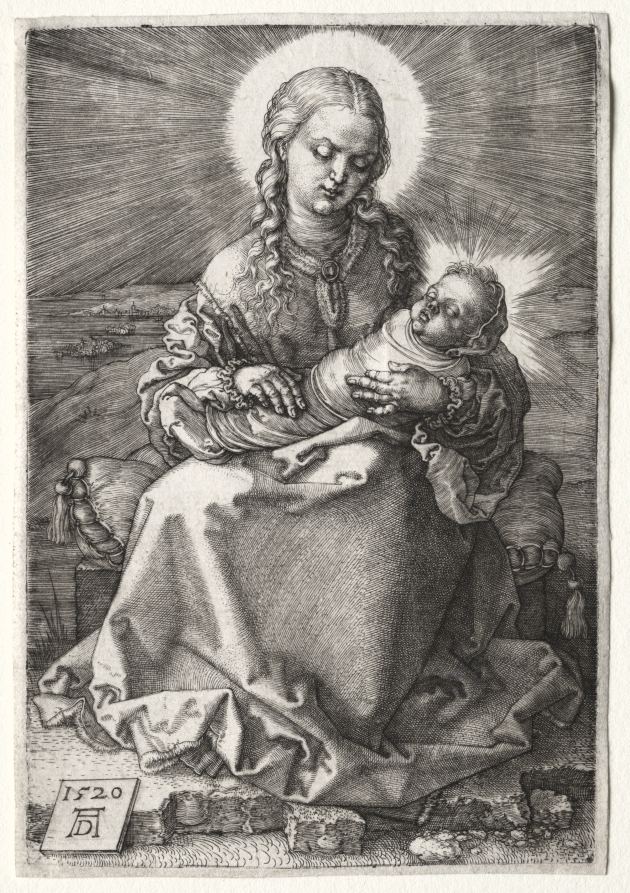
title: The Virgin with the Swaddled Child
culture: Germany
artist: Albrecht Dürer (German, 1471–1528)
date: 1520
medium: engraving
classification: Print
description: This image is among Dürer’s most sorrowful depictions of the Virgin and Child. In contrast to earlier engravings of the subject, Dürer presents them as monumental figures. Here, the Virgin sits on a large cushion and pensively cradles a tightly swaddled Christ Child. His wrappings, closed eyes, and stiff appearance evoke his future death and his burial shroud, emphasizing the outcome of his Passion as well as Mary’s foreknowledge of the events. Dürer draws attention to the Virgin’s holiness by rendering her halo as a white orb that radiates shafts of light over the earth. Dürer’s sculptural molding of the figures and his extensive use of middle tones to create dimension demonstrates his constantly evolving style and command of the medium in his late career.